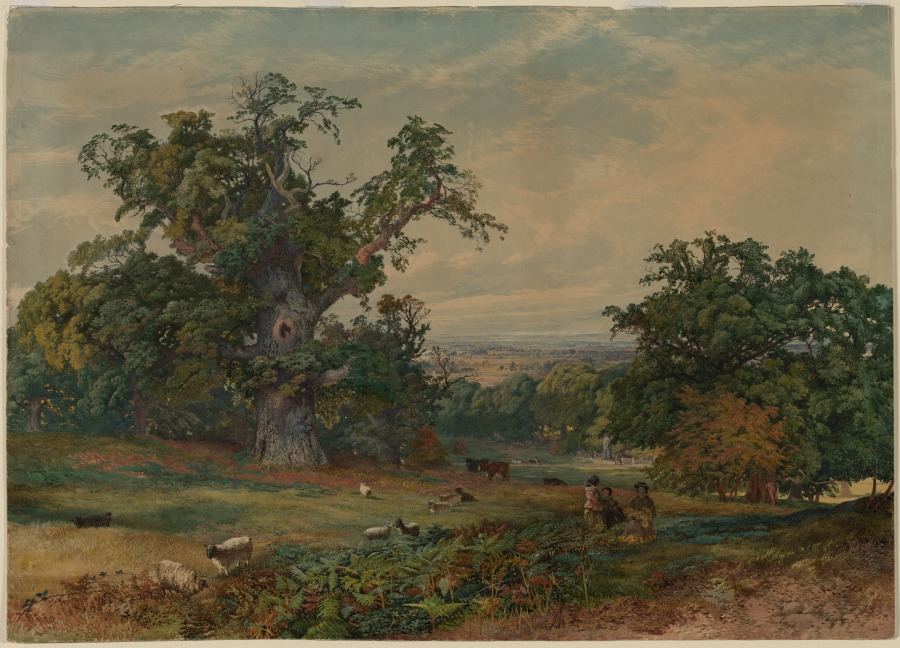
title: View near Bedford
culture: England, 19th century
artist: Bradford Rudge (British, 1805–1885)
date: c. 1825–85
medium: watercolor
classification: Drawing